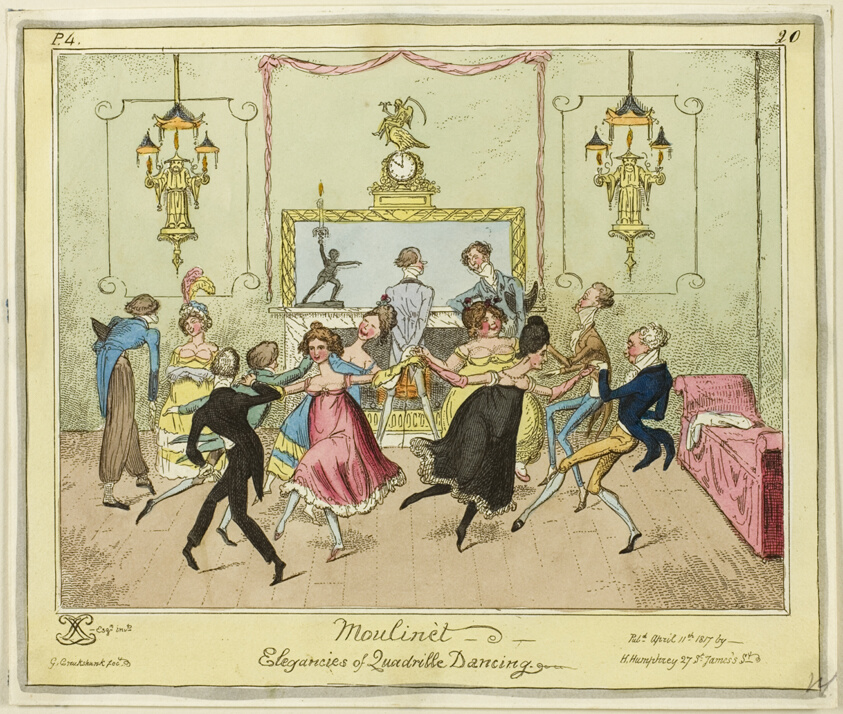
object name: Print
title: Moulinet-Elegances of Quadrille Dancing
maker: George Cruikshank (English, 1792-1878); published by Hannah Humphrey (English, c. 1745-1818)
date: published April 11, 1817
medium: Hand-colored etching on paper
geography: England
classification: etching; print; prints and drawing